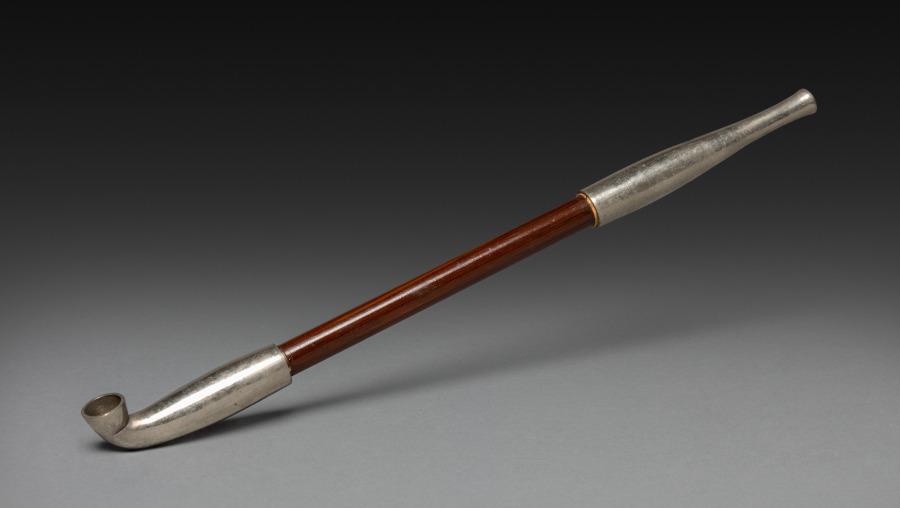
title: Tobacco Pipe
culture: Japan, Edo period (1615–1868) to Meiji period (1868–1912)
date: 1800s–early 1900s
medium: bamboo and metal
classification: Miscellaneous